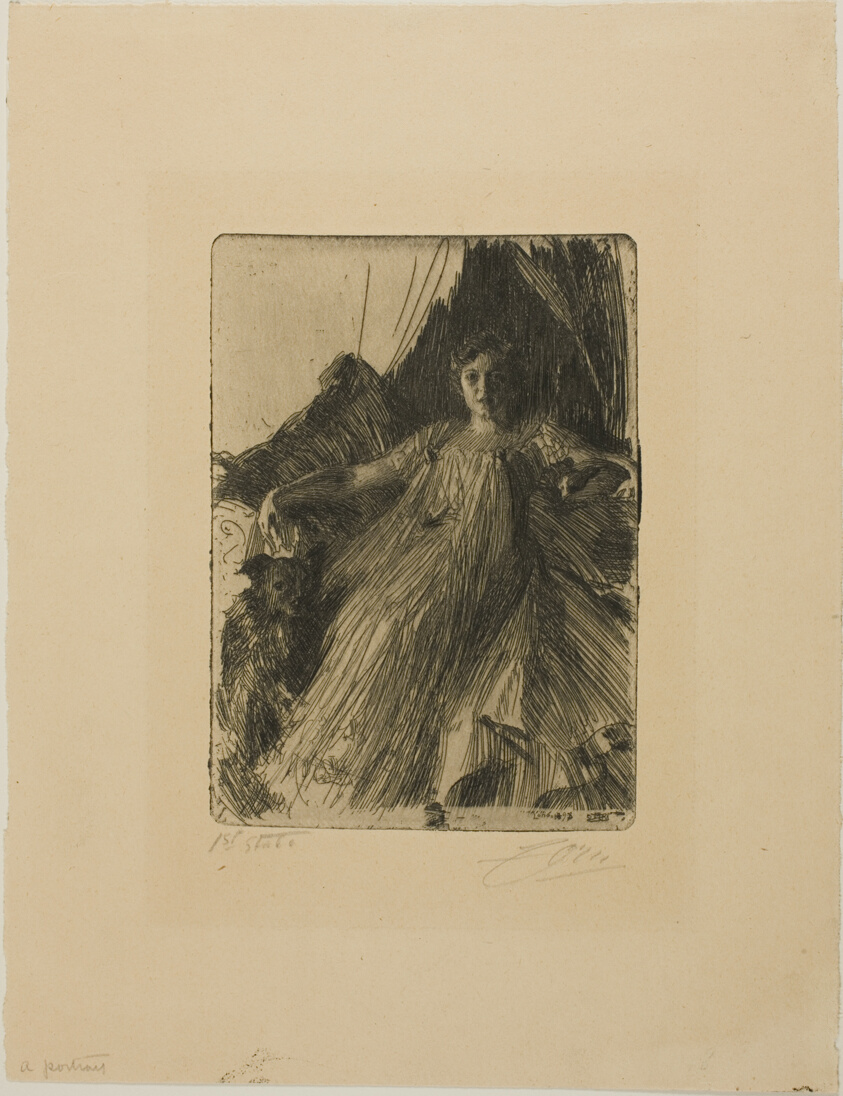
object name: Print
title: Maud Cassel (Mrs. Ashley)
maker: Anders Zorn (Swedish, 1860-1920)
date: 1898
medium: Etching on tan wove paper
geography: Sweden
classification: etching; print; prints and drawing